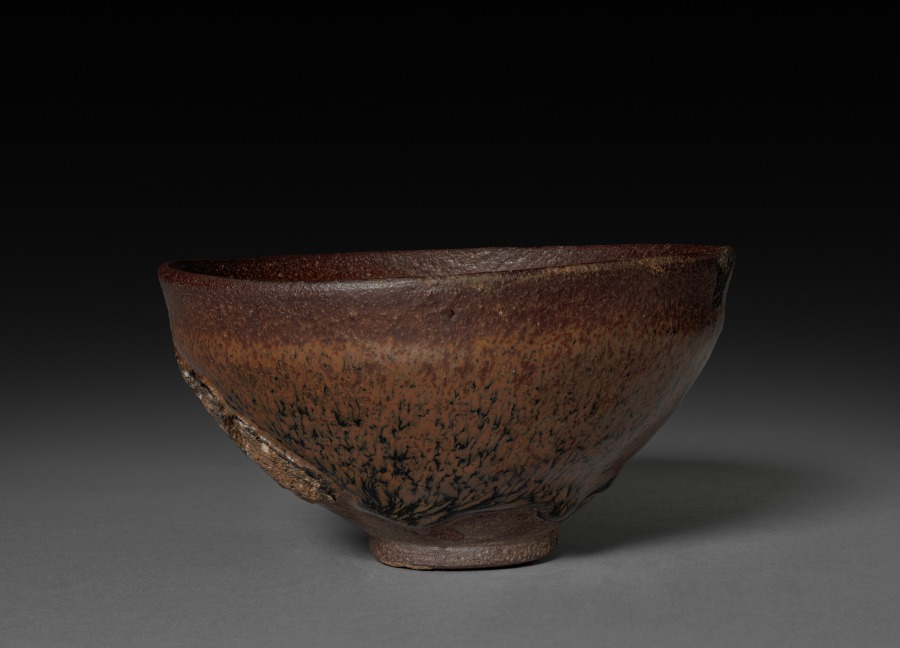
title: Tea Bowl: Jian ware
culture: China, near Shui ch'i, Song dynasty (960-1279)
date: 960–1279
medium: stoneware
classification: Ceramic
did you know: Jian ware was very popular with the tea cultures in China and Japan.